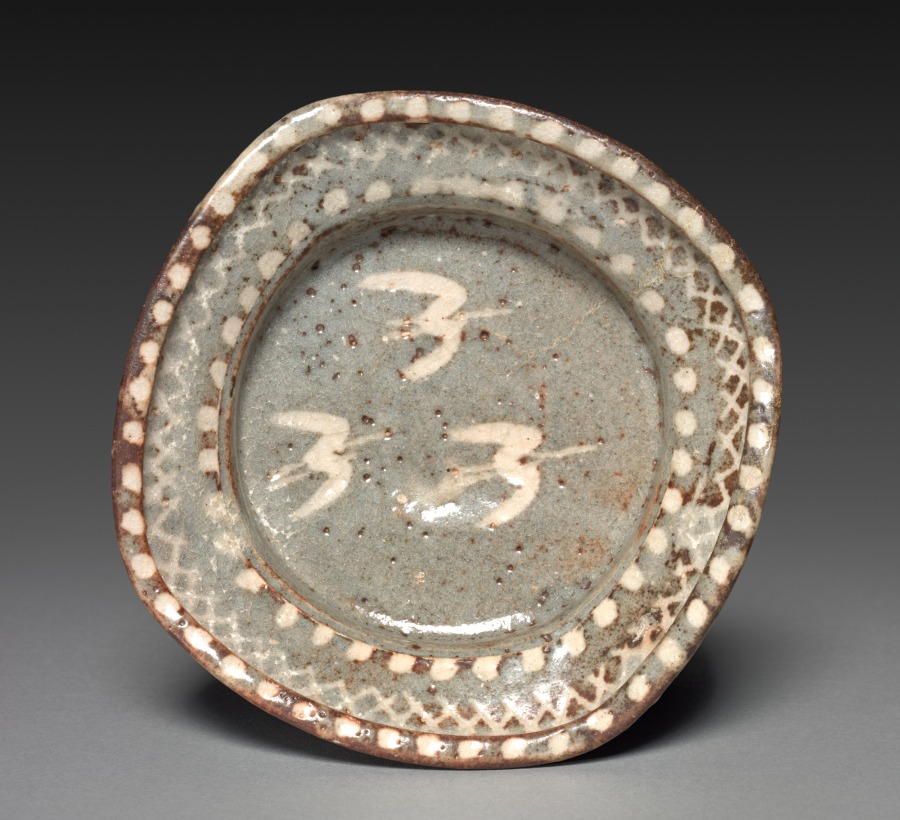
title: Dish with Design of Three Wild Geese in Flight: "Nezumi" Shino Ware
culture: Japan, Momoyama period (1573–1615)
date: c. 1600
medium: stoneware with underglaze iron slip decoration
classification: Ceramic